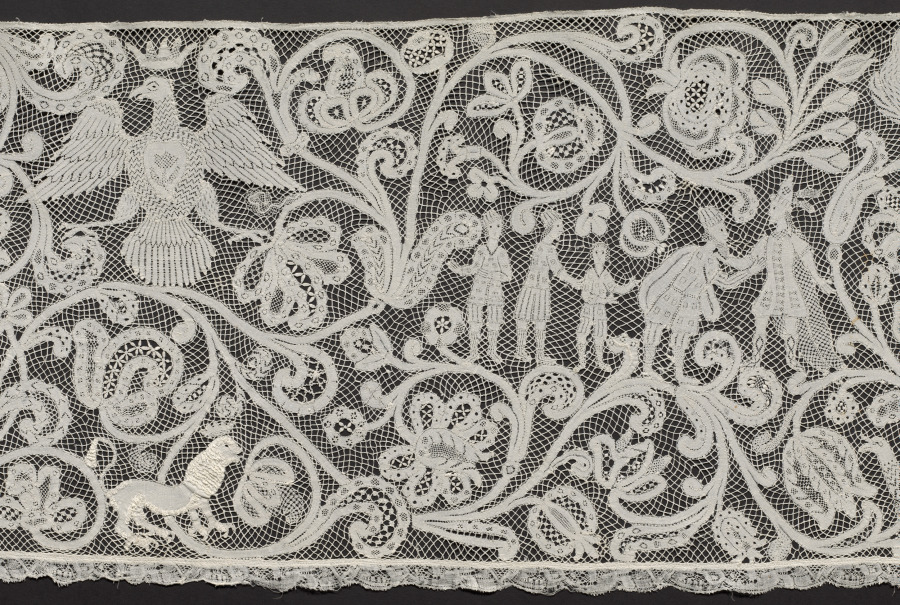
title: Lace Flounce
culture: Italy, Milan(?)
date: 1750–99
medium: Linen: bobbin lace (Punto di Milano)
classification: Lace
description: Being the most prestigious material, lace was used extensively by the 1600s for altar linen and for trimming priest’s albs, often incorporating finely rendered religious images amid blossoming vines. This alb flounce depicts scenes from the Old Testament story of Joseph, whose jealous brothers sold him to a caravan bound for Egypt. Joseph later interpreted dreams of the pharaoh, who made him ruler. When famine in Canaan caused Joseph’s ten brothers to travel to Egypt in search of food, they bowed down to him. After he revealed his identity, he forgave his brothers and God saved the family.